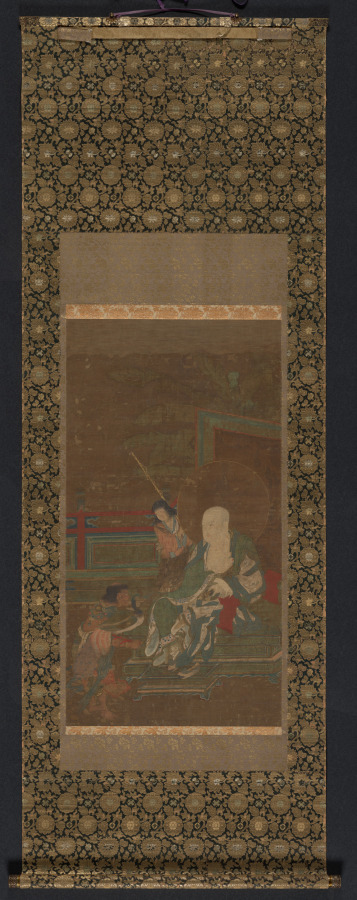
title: Seated Arhat with Two Attendants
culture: China, Southern Song dynasty (1127-1279)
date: late 1200s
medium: Hanging scroll; ink and color on silk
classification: Painting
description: Arhat, or Lohan (羅漢 in Chinese), were the disciples of the historical Buddha. Later tradition tended to picture them in sets of 16, 18, or as many as 500. This is one painting from a larger set, with a seated arhat portrayed on a grand scale, overshadowing his own attendant as well as the ferocious figure who approaches him with an offering of a wild goose.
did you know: The arhat holds a rolled up scroll, likely a sutra, and is seated before a standing screen decorated with a landscape painting.